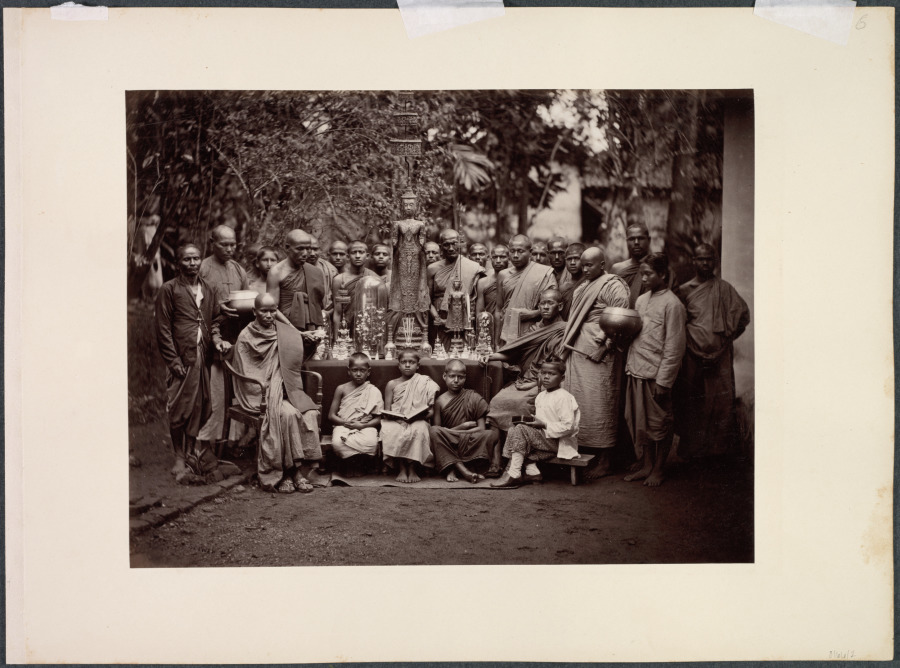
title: Untitled (recto)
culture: England, 19th century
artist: Skeen & Co. (British, active 1860–1920)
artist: Charles T. Scowen (British)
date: 1880s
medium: Albumen print, gold-toned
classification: Photograph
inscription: Written in pencil on mount with the image of the posed people: "6" Written in pencil on mount with image of oxen: "7" Written in pencil on verso of mat: "W.L.H. Skeen (1860-1900)/CEYLON, 1880s/gold-toned albumen print/1700 (Euros) 135 x 260 mm"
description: Probably taken by one of two British photographic firms based in Ceylon (present-day Sri Lanka), this image was likely shot by a European and was definitely made for a European audience, not for the individuals depicted. It is unlikely the sitters ever saw the finished photograph. Such ethnographic portraits were collected by governments as information, by tourists as souvenirs, and by “armchair travelers” as aids to the imagination. Viewers of the era would have regarded it more as a depiction of a cultural type than as a record of individual lives. Because interiors of temples were too dark to yield an image, the photographer arranged these Thai monks and worshippers along with some of their religious objects outdoors.